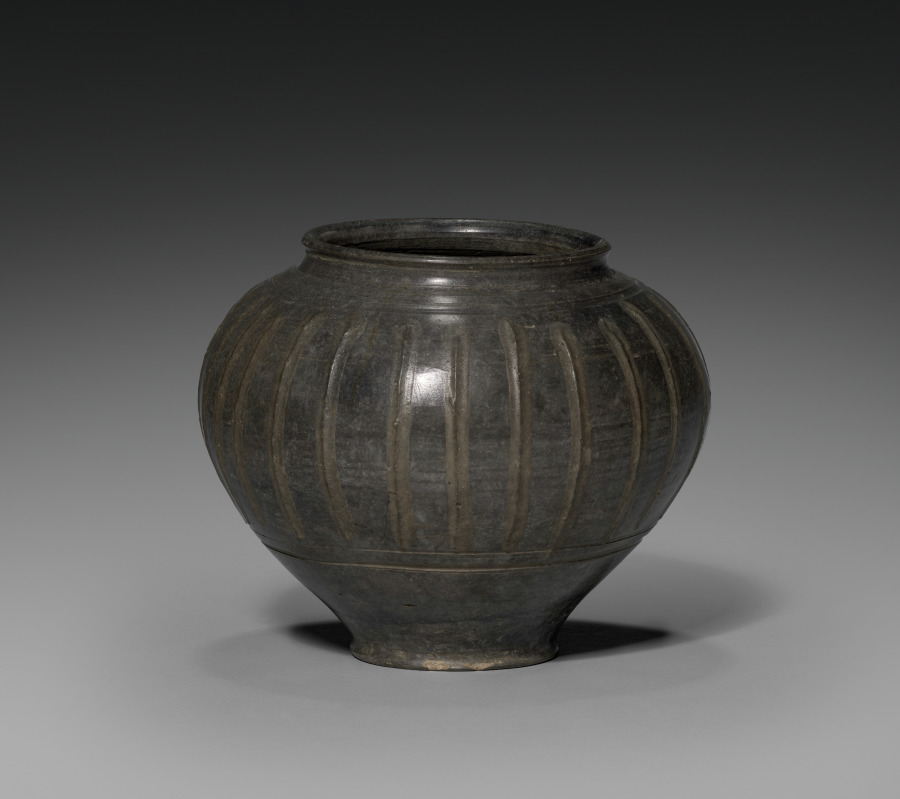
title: Pot with Cover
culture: Rhenish (Cologne), Gallo-Roman, 2nd century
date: 100s CE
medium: tan ware with gray and some brown burnished slip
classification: Ceramic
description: The work of Roman potters is very different from that of their Greek predecessors. Greek clay had allowed potters to throw thin-walled ceramics. Slips (paint) made from this clay had permitted painters to draw complicated scenes and figures with infinite care. As the Roman empire grew to include Germany and Britain, local clays found there were better for producing heavier pottery with three-dimensional decoration like the vases shown here. These jars--decorated with a human face (1992.125), animals (1992.126), a feather pattern (1992.183), a wheat pattern (1992.124), and vertical ribs (1992.127,a) were probably filled with foods or liquids and given either as gifts to an elaborate burial or as offerings to a god's shrine.